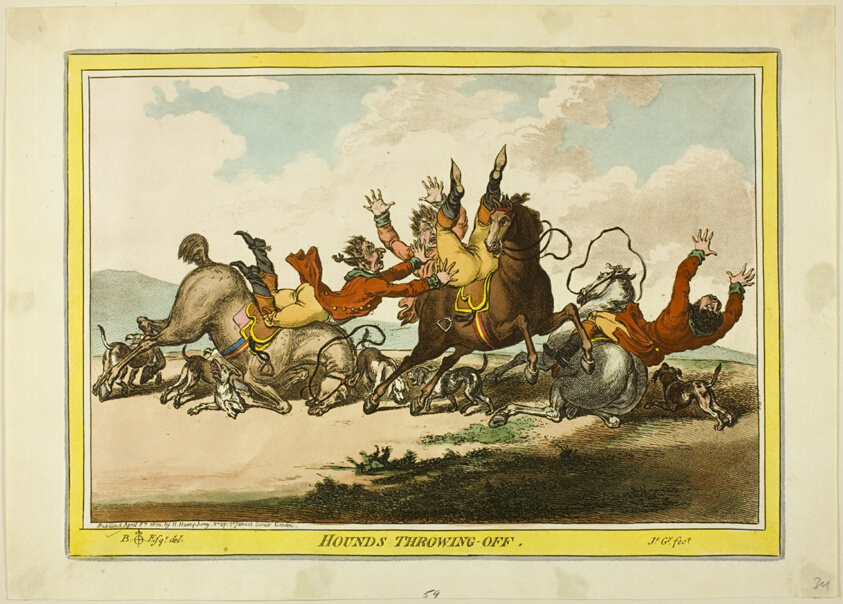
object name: Print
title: Hounds Throwing Off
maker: James Gillray (English, 1756-1815); after Brownlow North (English, 1778-1829)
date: published April 8, 1800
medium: Hand-colored etching on paper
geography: England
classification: etching; print; prints and drawing